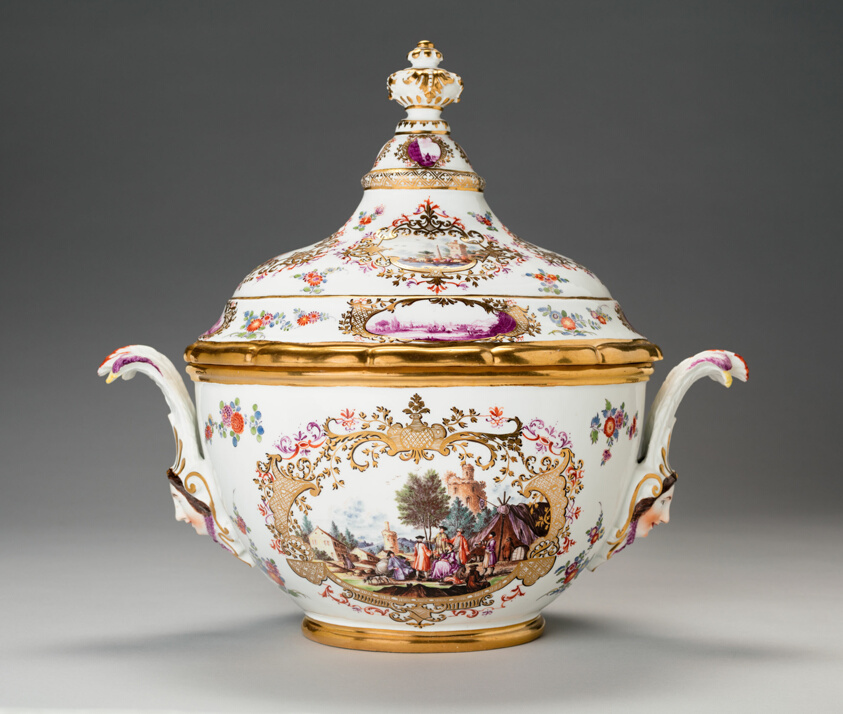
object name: Ceramics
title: Covered Tureen and Stand (One of a Pair)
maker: Meissen Porcelain Manufactory (Germany, founded 1710)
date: c. 1740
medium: Hard-paste porcelain, polychrome enamels and gilding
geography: Germany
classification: porcelain; european decorative arts; ceramics